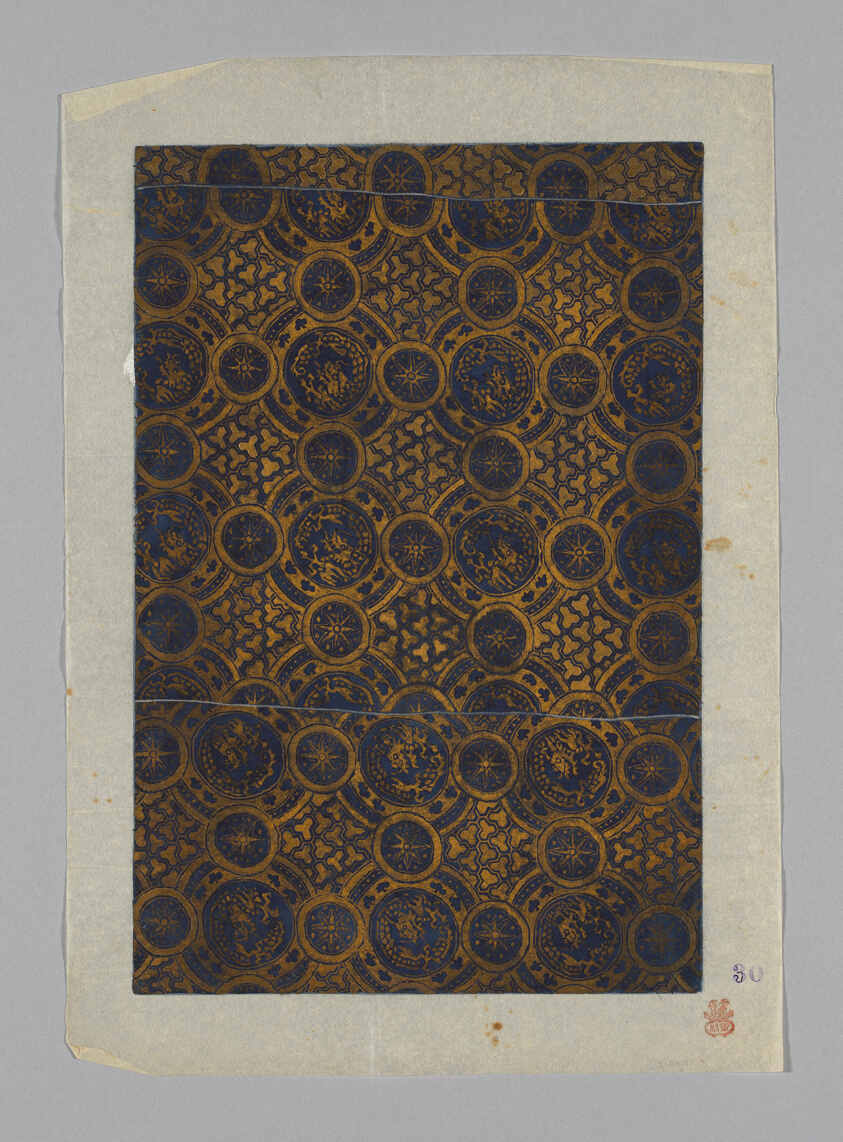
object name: Drawing and Watercolor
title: Design on Paper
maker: Japan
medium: Paper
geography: Japan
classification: textile; accessory - paper design; paper; watercolor